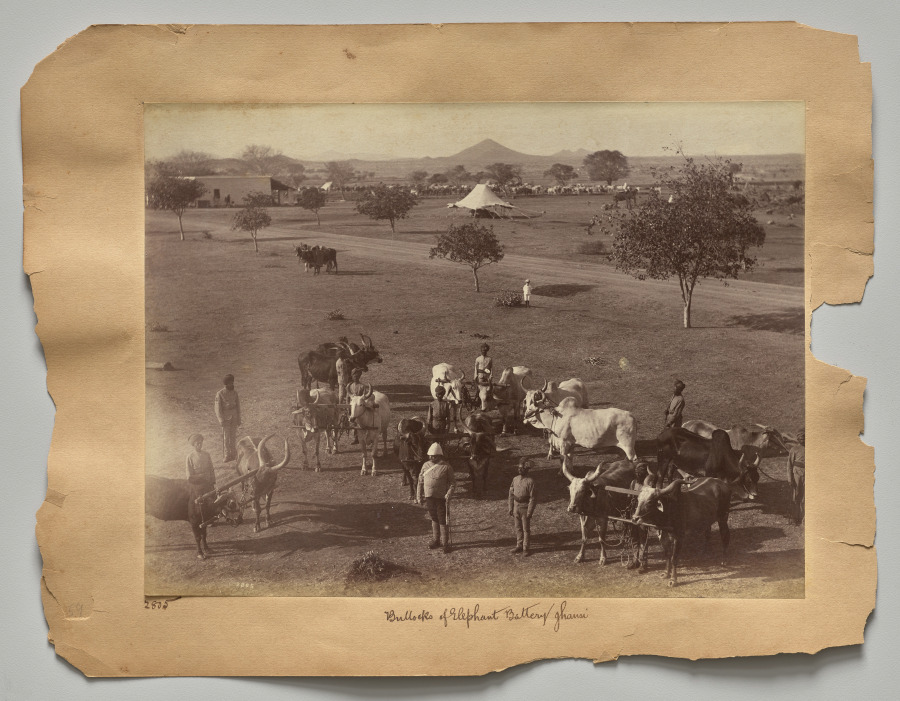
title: Bullocks of Elephant Battery, Jhansi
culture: India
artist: Raja Deen Dayal (Indian, 1844–1905)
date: c. 1882–87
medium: albumen print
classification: Photograph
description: These photographs are part of an album, now disassembled, of around 105 photographs taken in India between 1885 and summer 1887 that provide glimpses into the lives of the British colonial elite and royal and upper-class Indians. The museum holds another group of 37 pictures from this album (2016.266), which was probably commissioned by a British civil servant visiting or working in India around 1888 as a personal souvenir of his experiences there.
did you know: Raja Deen Dayal is regarded now, and was considered during his lifetime, to be India’s most important 19th-century photographer.